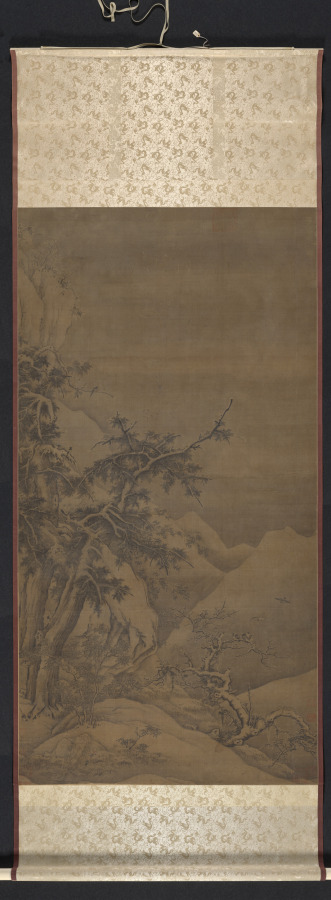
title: Birds in a Grove in a Mountainous Winter Landscape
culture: China, Jin dynasty (1115-1234)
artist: possibly by Gao Tao (Chinese, 1100s)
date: 1100s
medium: hanging scroll; ink and slight color on silk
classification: Painting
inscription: A signature and a seal at lower left edge: Gao Tao 高燾; seal undecipherable. 10 additional seals: 1 of Zhu Gang 朱棡 [1358–1398]; 3 of Suo’etu 索額圖 [1636–1703]; 2 of A’erxipu 阿爾喜普 [1700s]; 1 of Weng Fanggang 翁方綱 [1733–1818]; 3 unidentified.